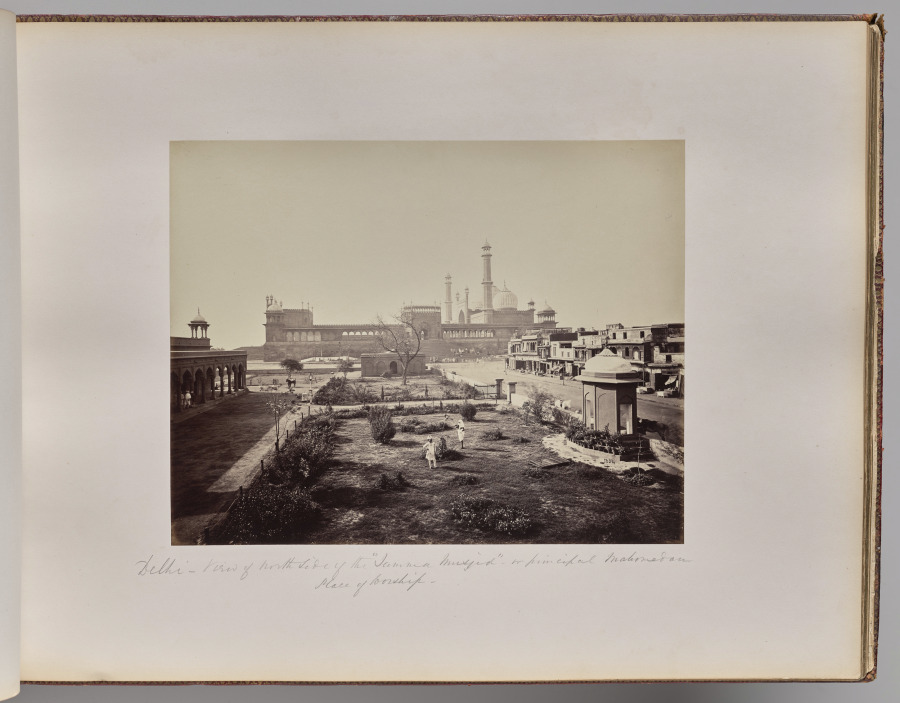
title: Delhi. View of North Side of the Jamma Musjid in Principal Mabonedau Place of Worship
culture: England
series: Photographs of Northern India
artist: Samuel Bourne (British, 1834–1912)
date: 1863–70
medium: albumen print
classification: Photograph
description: The 50 images in this album, all taken in the 1860s, move from the hill towns of the Himalayas down to cities including Lahore (now in Pakistan), Delhi, Lucknow, Agra, Benares (now Varansi), and Calcutta (now Kolkata). Architectural studies of major monuments offer valuable historical records of what sites such as the Taj Mahal and the imperial mosque of the Mughal emperors in Delhi looked like before twentieth-century restorations.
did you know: Samuel Bourne, the author of most the images in this album, was a banker in England before he moved to India to become a professional photographer.